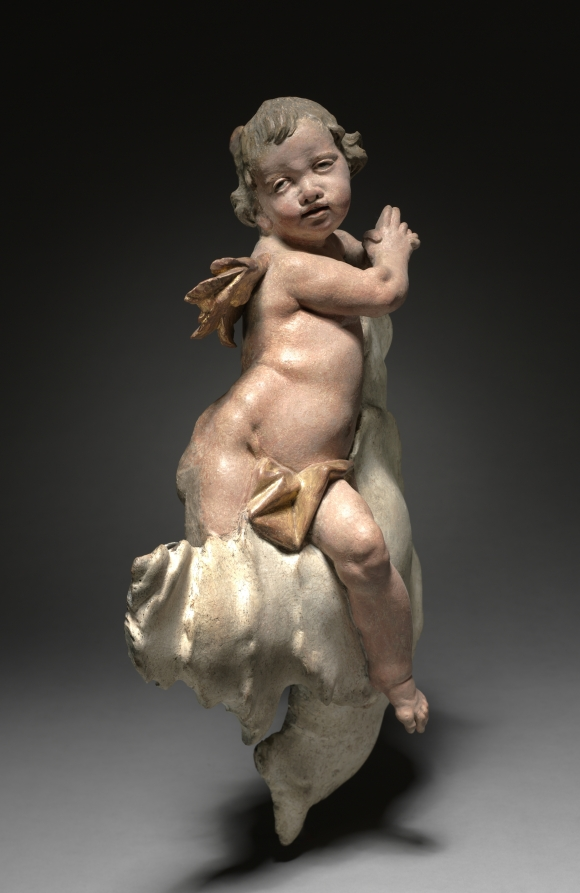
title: Putto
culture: Germany, Munich, 18th century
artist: workshop of Ignaz Günther (German, 1725–1775)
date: c. 1760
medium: painted and gilded wood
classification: Sculpture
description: This charming winged putto reclines on a cloud, hands clasped in an attitude of adoration. It is probably a fragment of a large decorative scheme of a church, perhaps the Johanneskirchen near Munich.